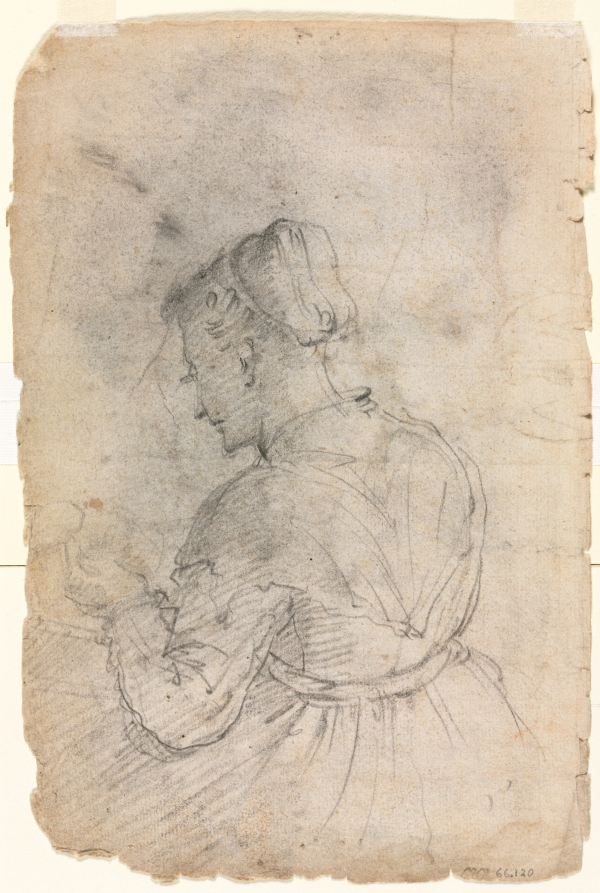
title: A Kitchen Maid (verso)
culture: Italy, 16th century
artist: Alessandro Casolani (Italian, 1552/53–1607)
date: 1550–1600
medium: black chalk(?)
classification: Drawing